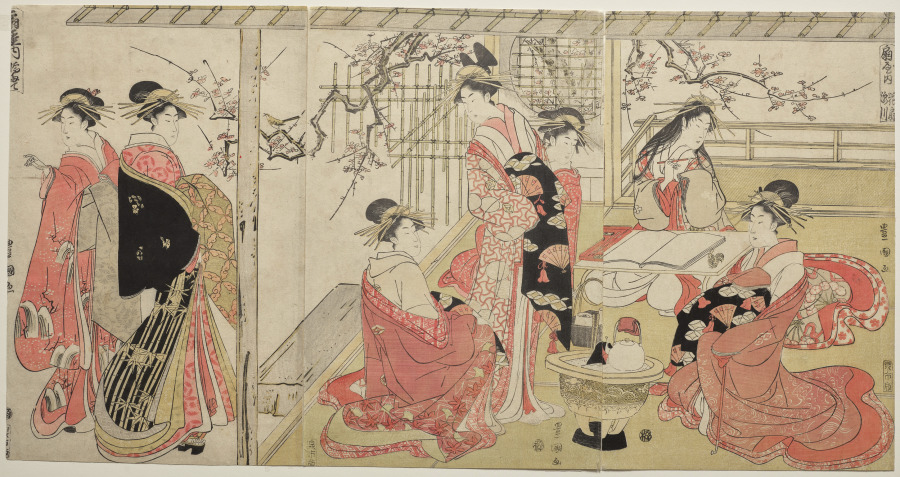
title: Courtesans of the Ōgiya on a Spring Outing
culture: Japan, Edo period (1615–1868)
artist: Utagawa Toyokuni (Japanese, 1769–1825)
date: mid- or late 1790s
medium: Triptych of woodblock prints, ink and color on paper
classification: Print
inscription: Signature: Toyokuni ga.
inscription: Publisher: Izumiya Ichibei (Senichi han). Censorship Seal: kiwame.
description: In these prints, two courtesans of the Ōgiya brothel are entering an open pavilion, while another group gathers around a Japanese hibachi inside. Hanaōgi, the most celebrated courtesan of Ōgiya in the late 1700s, is depicted at a desk. Holding a brush in her hand, she turns her head to one side as if gathering her thoughts before writing in the book before her. Both her position and her loosened hair separate Hanaōgi from her courtesan companions who wear elaborate coiffures. This depiction of her captures both her knowledge of poetry and her skill as a calligrapher.